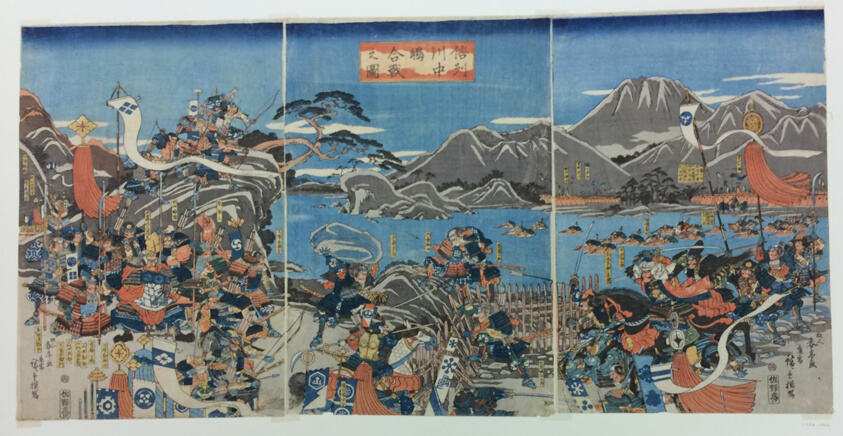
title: The battle of Kawanakajima in Shinano Province.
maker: Utagawa Hiroshige 歌川 広重; Japanese, 1797-1858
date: c.1843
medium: Color woodblock prints; oban triptych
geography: Japan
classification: woodblock print; print; asian art